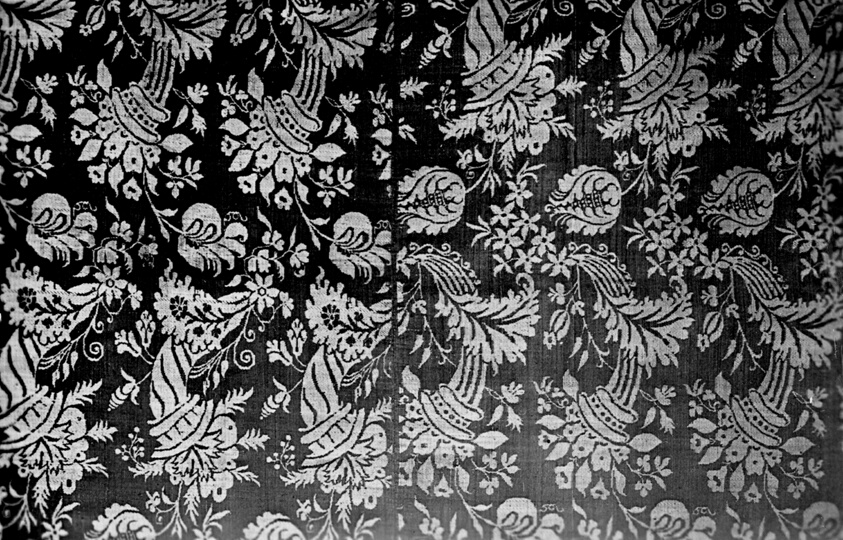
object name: Textile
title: Panel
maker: France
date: 18th century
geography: France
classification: textile; weaving